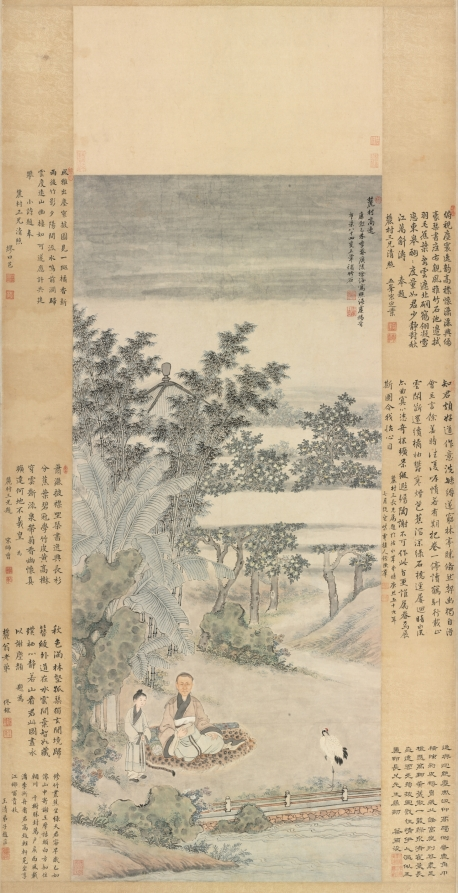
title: Portrait of An Qi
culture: China, Qing dynasty (1644-1911)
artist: Wang Hui (Chinese, 1632–1717)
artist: Tu Luo (Chinese, active c. 1715)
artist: Yang Jin (Chinese, 1644–1728)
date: 1715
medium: hanging scroll; ink and color on paper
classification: Painting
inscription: [印]上下千年. 麓村高逸：康煕乙未季春，廣陵涂洛寫照，海虞楊晉布景，八十四叟王翬補竹石。[印]耕煙; 王翬之印.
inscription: 俯視塵寰逸韻高，襟懷潚灑興偏豪。/ 琴書座右親風雅，竹石池邊拭羽毛。/ 蕉葉亂雲遮北礀，鶴翎凝雪戀東皋。/ 翩翩度量如君少，靜對秋江萬斛濤。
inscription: 知君頗好道，作意洗緐縟。/ 遂窮林亭勝，翛然契幽獨。/ 自得會忘言，餘善時往復。/ 岸幘若有期，把卷一停讀。/ 鶴馴行載正，雲閑斷還續。/ 橘柚欎寒煙，芭蕉瀉深綠。/ 石橋逕屢迴，暗水流亦曲。/ 真心恣奇探，曠景縱遐矚。/ 陶謝不可作，此旨更誰屬。/ 眷焉展斯圖，令我怡心目。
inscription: 逸興迥絶塵，風流仰高躅。/ 側無鹿角巾，横呈豹皮褥。/ 胸藏山壑富，座列琴囊足。/ 橙懸萬顆黄，蕉散一叢綠。/ 泉清鶴景長，樹遠雲光續。/ 披圖識性情，伊人温似玉。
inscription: 風雅出塵寰，披圖見一斑。/ 橘香新雨後，竹影夕陽間。/ 流水鳴前澗，歸雲渡遠山。/ 幽棲如可遂，應許共追攀。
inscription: 蕭灑披襟坐，琴書逸興長。/ 衫分蕉葉碧，冠學竹皮黄。/ 高樹穿雲斷，流泉帶菊香。/ 幽懷真曠達，何地不羲皇。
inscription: 秋色滿林壑，孤琴獨玄閒。/ 境歸簪紱外，道在水雲間。/ 棄智如藏璞，栖心静若山。/ 看君此圖畫，永以謝塵顏。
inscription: 修竹叢蕉坐綠天，君容早歳已如仙。/ 山中寄謝王摩詰，頭白方知住輞川。/ 千樹勝封萬戸侯，西風載滿李衡舟。/ 看君高致輕軒冕，坐享江鄉富貴秋。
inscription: 6 seals unidentified.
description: An Qi, the subject of the portrait, was a second-generation salt merchant from Korea. He used part of his wealth to collect art. At the time this painting was commissioned, An was less than 40 years old. He is represented as a Daoist recluse in nature, informally dressed with attributes such as books and a wrapped guqin instrument, a portrait convention for literati-scholars since the Six Dynasties period (220–589 CE). The local Taihu rock, banana plants, and crane suggest a southern garden and a life in seclusion. An’s portrait is evidence of merchants aspiring to the scholar-official class. According to the inscription, this painting was the joint effort of three men, the eldest and most famous was Wang Hui. While the garden setting is homogenous in style, it contrasts with the application of opaque pigments and shading employed for the depiction of An Qi’s face.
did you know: Seven of An Qi's close friends wrote poetic inscriptions on the silk brocade mount around his portrait.